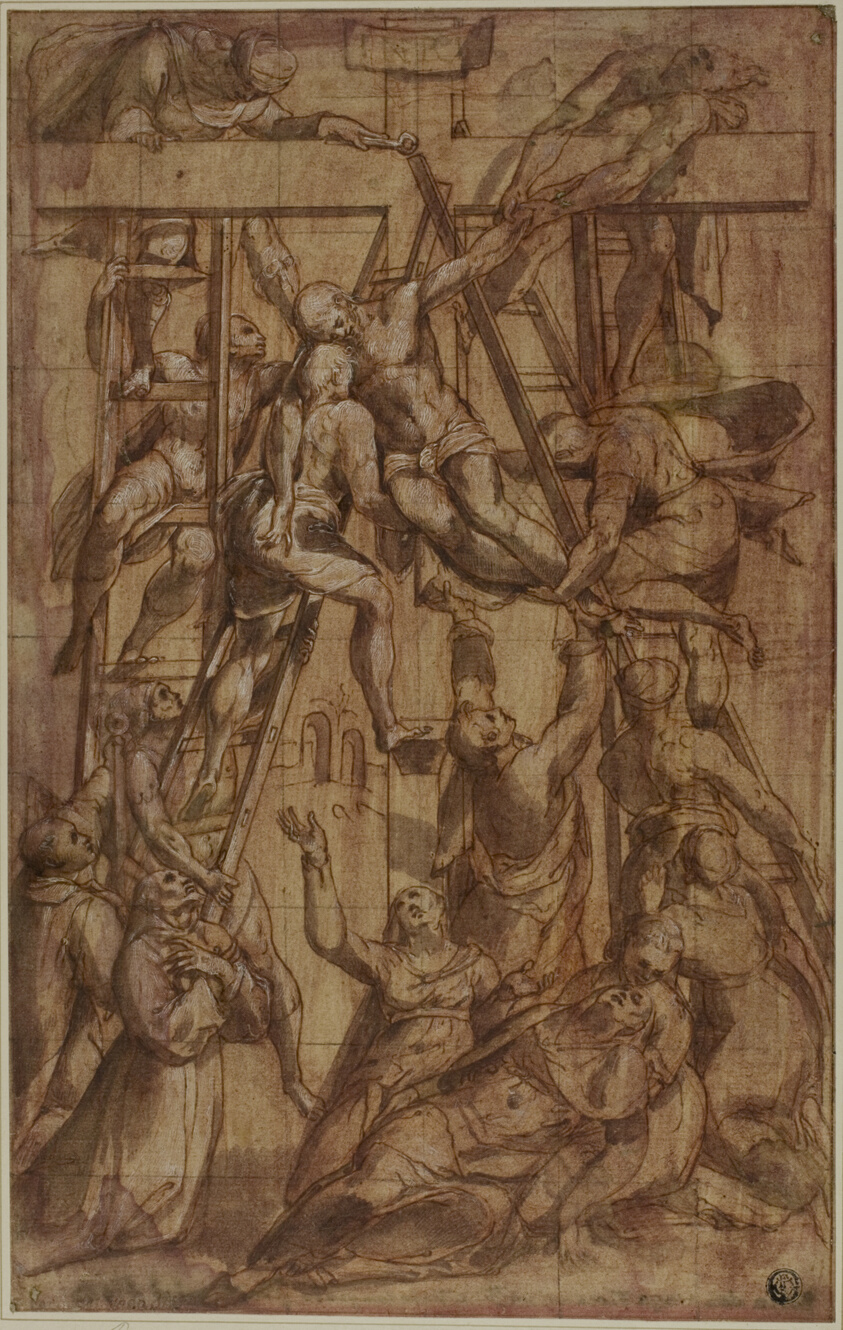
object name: Drawing and Watercolor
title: Deposition, with Saint Francis of Assisi and Another Male Saint (Stephen?)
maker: Attributed to Simone De Magistris; Italian, 1538-c. 1611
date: c. 1576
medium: Pen and brown ink with brush and brown and red wash, heightened with white gouache, on cream laid paper, squared in black chalk, laid down on ivory board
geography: Italy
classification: pen and ink drawings; drawings (visual works); prints and drawing